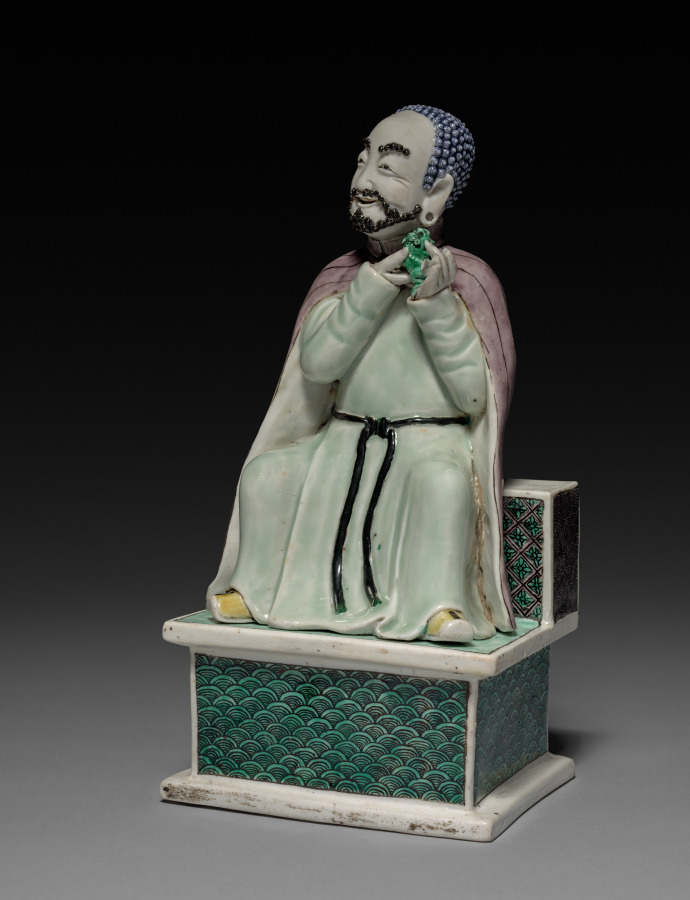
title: Lohan (Arhat) Holding a Fu Dog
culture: China, Jiangxi province, Jingdezhen kilns, Qing dynasty (1644-1911), Kangxi reign (1662-1722)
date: 1662–1722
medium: porcelain with famille verte overglaze enamel decoration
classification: Ceramic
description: Lohan are disciples of Buddha with supernatural powers and eccentric behaviors. This lohan is holding the fu-dog, symbolizing good luck, while its mate is holding the peach of longevity (shoutao). With carefree smiles and playful gestures, these two figures embody a humorous attitude and a detachment from worldly affairs. This pair of porcelain figures was perhaps part of a house altar set or a decorative item in a household.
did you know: This lohan and its pair embody a humorous attitude and playful behavior, indifference to danger and miracles, and hence a detachment from worldly affairs.